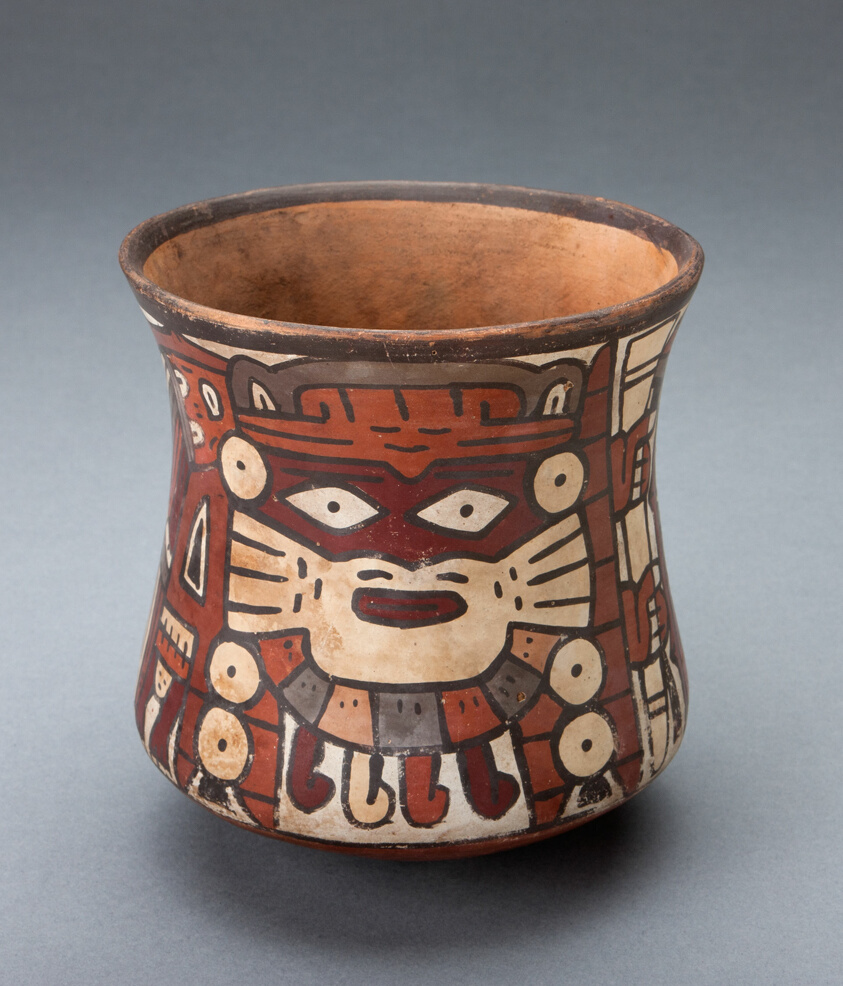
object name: Vessel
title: Cup Depicting a Masked Performer Holding Staffs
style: nazca, early intermediate period, Pre-Columbian, americas, Arts of the Americas, andean, andes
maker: Nazca; South coast, Peru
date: 180 BCE–500 CE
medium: Ceramic and pigment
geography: Nazca Valley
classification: earthenware; art of the americas; ceramics; vessel